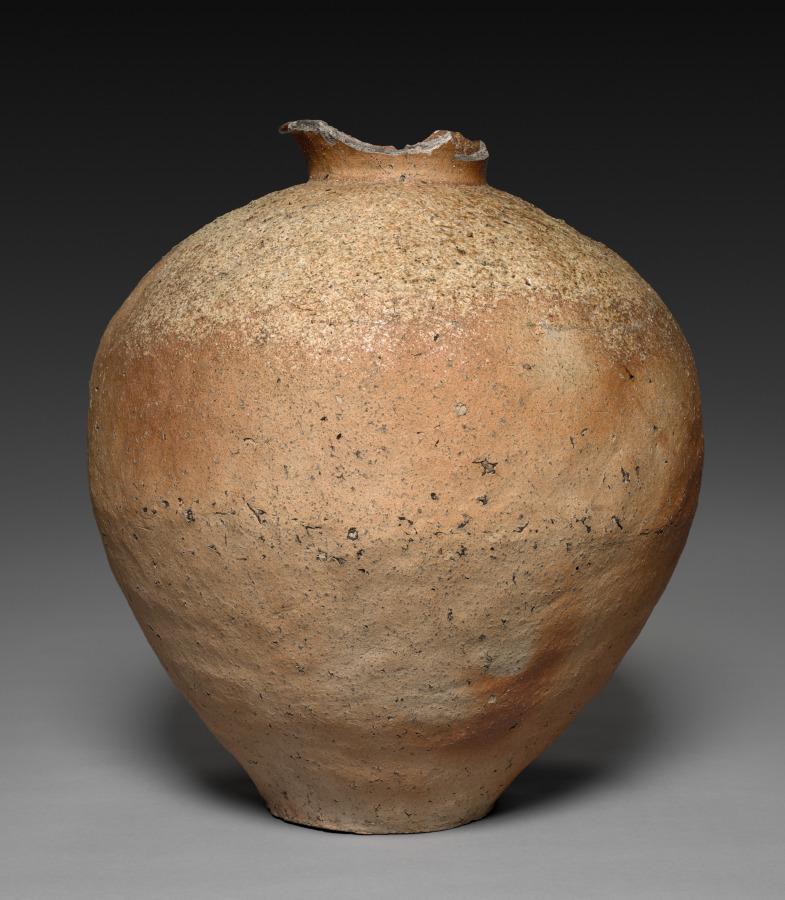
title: Storage Jar (Tsubo)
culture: Japan, Muromachi period (1392–1573)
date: 1400s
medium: stoneware with natural ash glaze (Shigaraki ware)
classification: Ceramic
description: This bulbous clay jar, with its expansive, dry orange-brown surface, white dots of feldspathic stone, and spidery crazing marks epitomizes one type of medieval ware from Shigaraki. This region east of Kyoto and north of the older cultural and religious center of Nara has long been known as a source of superior clay material. Shigaraki storage jars were crafted for strength and durability. The vessel's slightly lopsided shape shows precisely where its three lower clay sections connect with one another. The "stubble" on the upper shoulder sections is highlighted by dripping rivulets of dull-green ash glaze in one small area on the broken neck. The same natural glaze runs over the slope of the shoulder and also appears as a large splash of thin, glossy olive green where the shoulder joins the upper body.